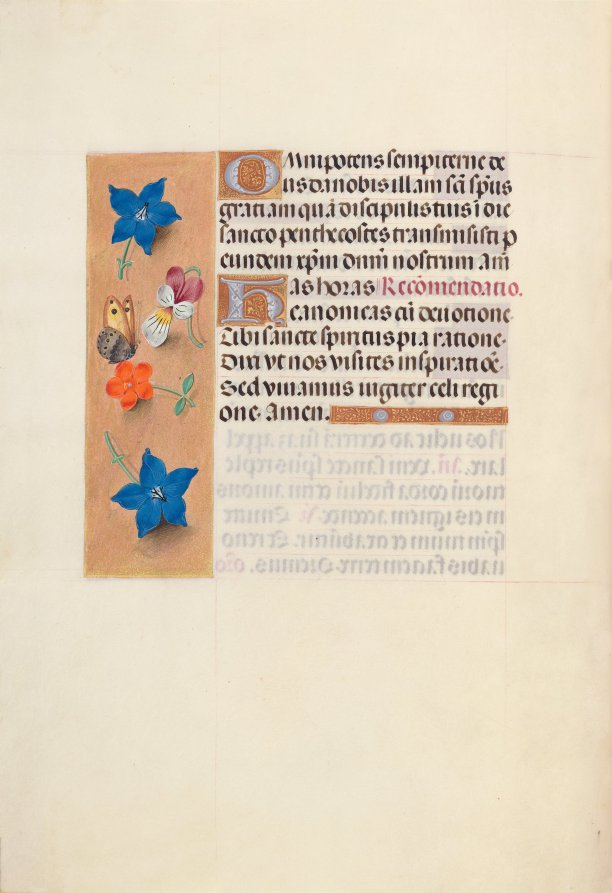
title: Hours of Queen Isabella the Catholic, Queen of Spain: Fol. 36v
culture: Flanders, Ghent and Bruges, late 15th century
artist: Master of the First Prayerbook of Maximillian (Flemish, c. 1444–1519)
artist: and Associates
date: c. 1500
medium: ink, tempera, and gold on vellum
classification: Bound Volume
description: This manuscript was illuminated by a circle of at least five highly organized manuscript painters active in the Flemish cities of Ghent and Bruges. The principal illuminator was Alexander Bening, who painted the majority of the book's miniatures. Manuscripts produced by this circle of artists are renowned for the decoration of their borders, which typically feature a rich variety of realistically-painted flowers, birds, and butterflies. This prayer book, called a book of hours, was intended not for a cleric, but for the private devotions of a lay person-in this case, Isabella the Catholic, Queen of Spain (1451-1504). Isabella's coat of arms embellishes the book's frontispiece. It is unlikely that the book was commissioned by the Queen herself; rather, she probably received it as a diplomatic gift from someone courting her patronage, perhaps Cardinal Francisco Jimenez de Cisneros. A Franciscan friar, Jimenez was dependent upon Isabella for his advancement, first to the post of Queen's confessor in 1492, and then to Archbishop of Toledo in 1495.